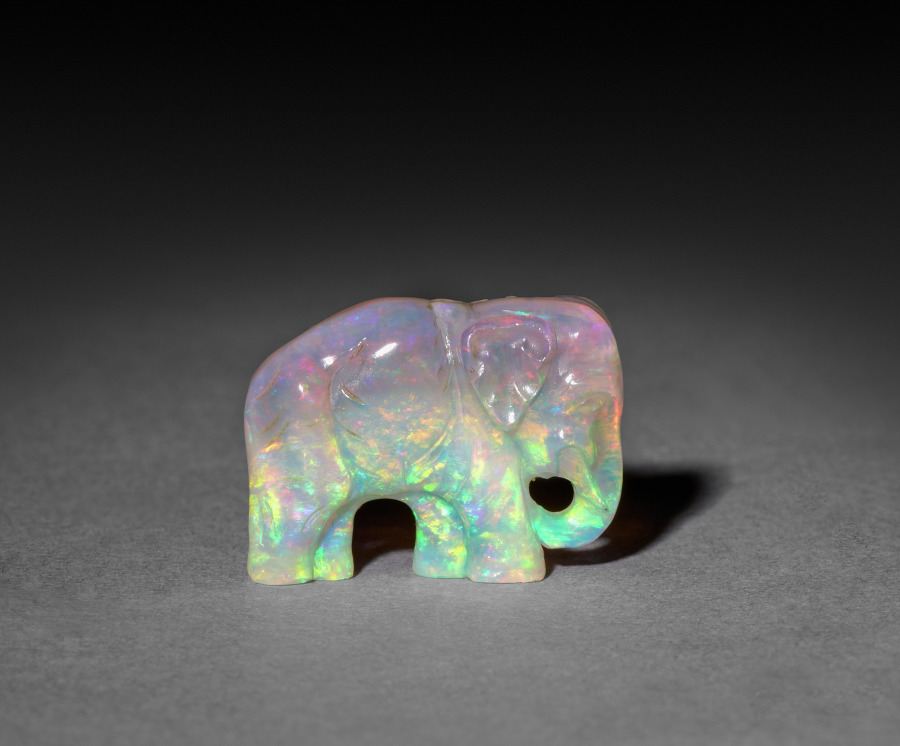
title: Elephant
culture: Russia, St. Petersburg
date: late 1800s-early 1900s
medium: opal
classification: Miscellaneous